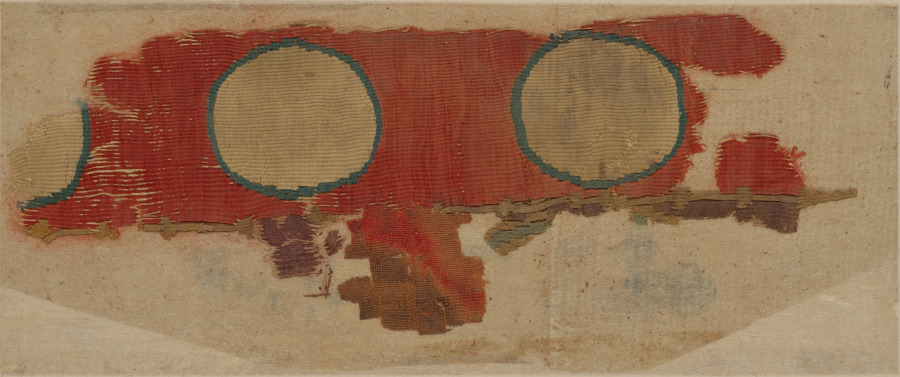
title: Fragment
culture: China, 7th - 8th century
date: 600–799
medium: tabby weave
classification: Textile